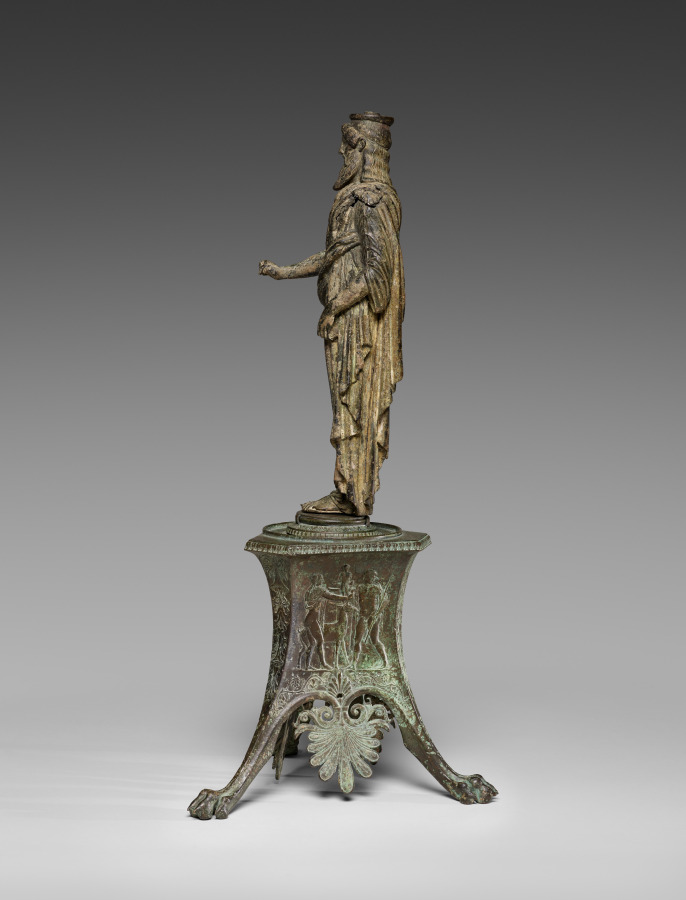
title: Tripod Base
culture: Italy, Roman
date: 100–1 BCE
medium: bronze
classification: Sculpture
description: This unusual tripod base features three clawed feet, an abundance of vegetal ornament, and three different figural scenes in low relief. Two seem to show sanctuary settings: first, a small Archaistic statue of Athena flanked by a woman with small offerings and a man holding a kid and leading two goats; and second, a small youthful male statue behind two beardless figures—perhaps Apollo, with a stag, and Dionysos, holding a thyrsos. The third scene shows Herakles, holding a club while leading a woman, maybe Auge or Alcestis. Although perhaps similarly eclectic in style, the base and the sculpture it now supports differ in their alloys and patinas.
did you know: This elaborate base may have originally supported an ornate lamp (not the statuette now displayed atop it).